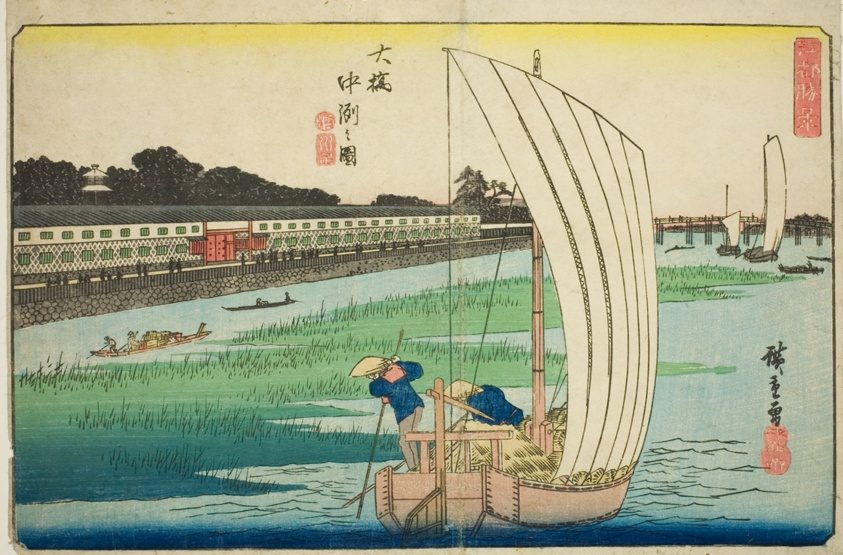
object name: Print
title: Nakasu at Ohashi (Ohashi Nakasu no zu), from the series "Exceptional Views of Edo (Koto shokei)"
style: Japanese (culture or style)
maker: Utagawa Hiroshige 歌川 広重; Japanese, 1797-1858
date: c. 1835/39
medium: Color woodblock print; oban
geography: Japan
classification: woodblock print; print; asian art